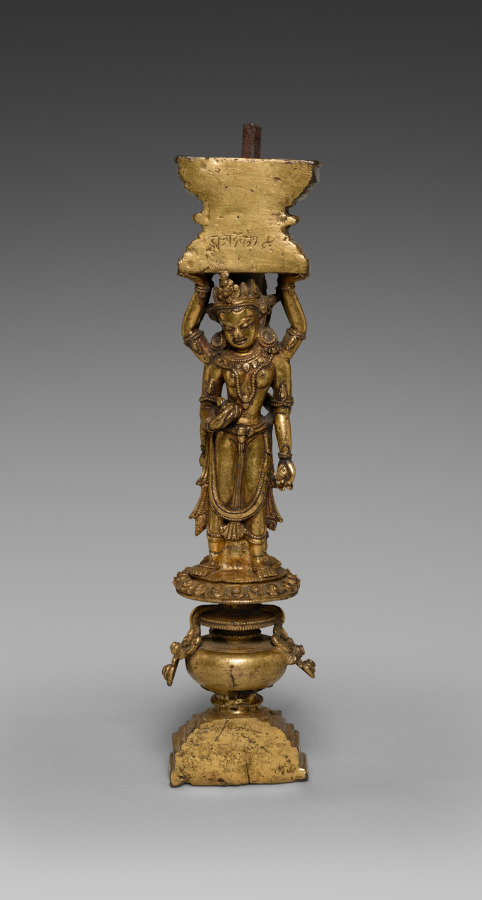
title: Support with Addorsed Figures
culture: Tibet, Densatil Monastery, 15th century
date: 1400s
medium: gilt bronze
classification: Sculpture